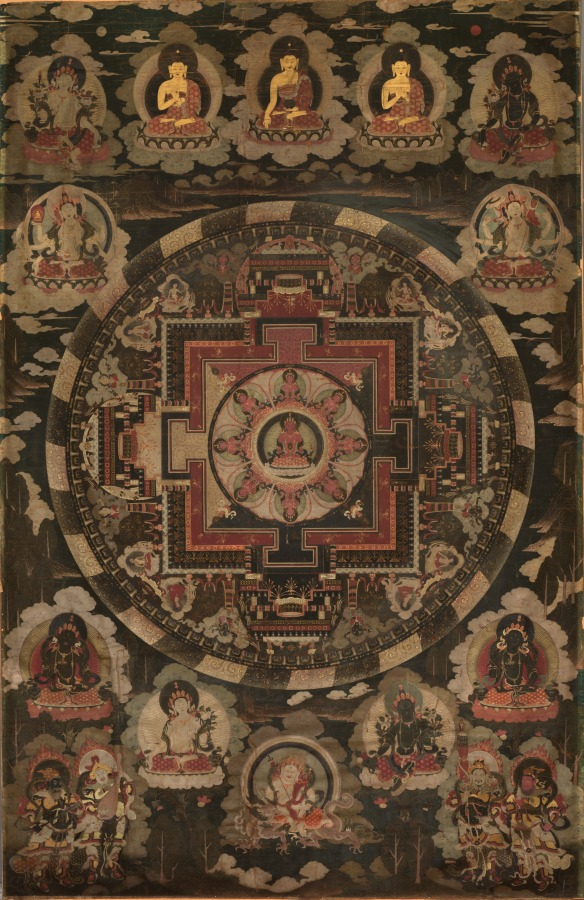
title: Mandala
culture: Tibet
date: early 1700s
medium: color on canvas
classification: Painting